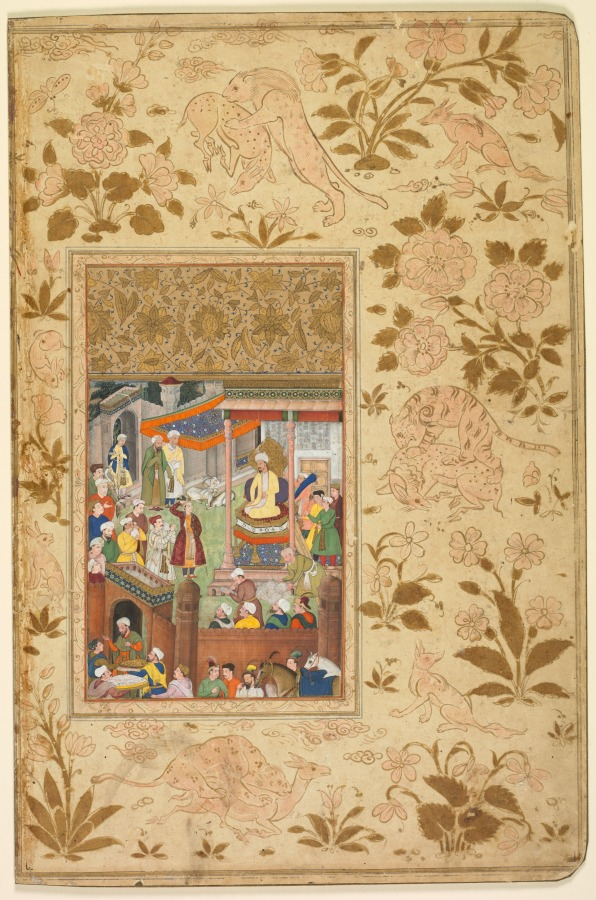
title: Babur receives booty and Humayun’s salute after the victory over Sultan Ibrahim in 1526, from an Akbar-nama (Book of Akbar) of Abu’l Fazl (Indian, 1551–1602)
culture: Mughal India, court of Akbar (reigned 1556–1605)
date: c. 1596–1597 or 1604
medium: Gum tempera and gold on paper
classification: Painting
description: The first Mughal emperor Babur sits enthroned as men bring gifts and sacks of tribute to mark a successful expansion of his territories. Emblematic of his role in leading the victory, his son Humayun wears a wine-and-gold robe of honor despite the Delhi heat in late April. Marking the royal space are a carpet and canopy painted with a lapis lazuli ground. The floral vine motif called arabesque swirls around a central lobed medallion. These delicate patterns are inspired from Persian manuscript illuminations. Contemporary historians describe awnings of gold embroidery, brocade, and velvet along with colorful carpets resembling a beautiful flower bed.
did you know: A clerk records the amount of tribute that Babur received from conquered kings.